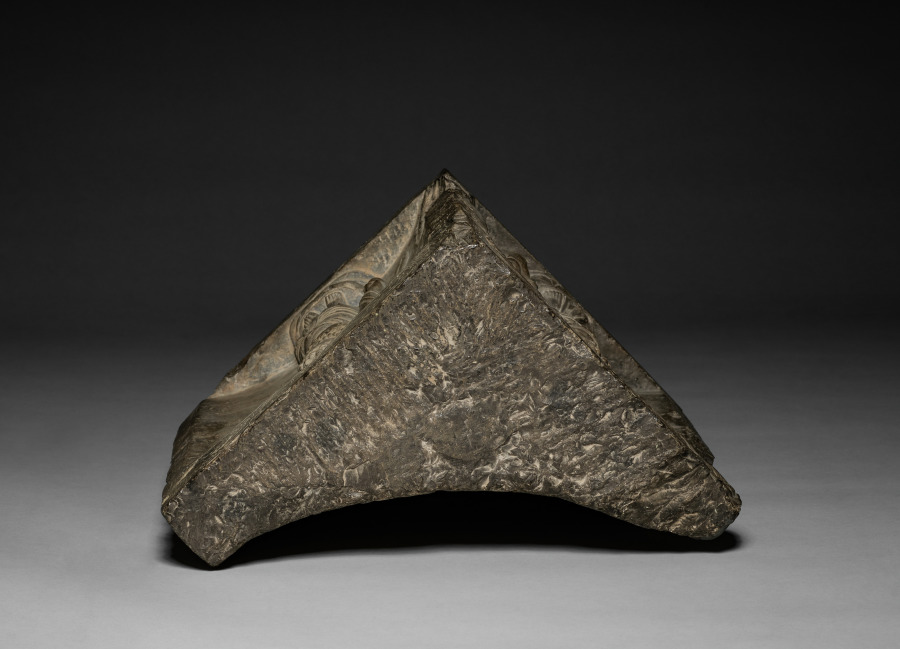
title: Corner Stone with Two Eleven-Headed Guanyin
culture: China, Tang dynasty (618-907)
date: c. 700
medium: stone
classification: Sculpture